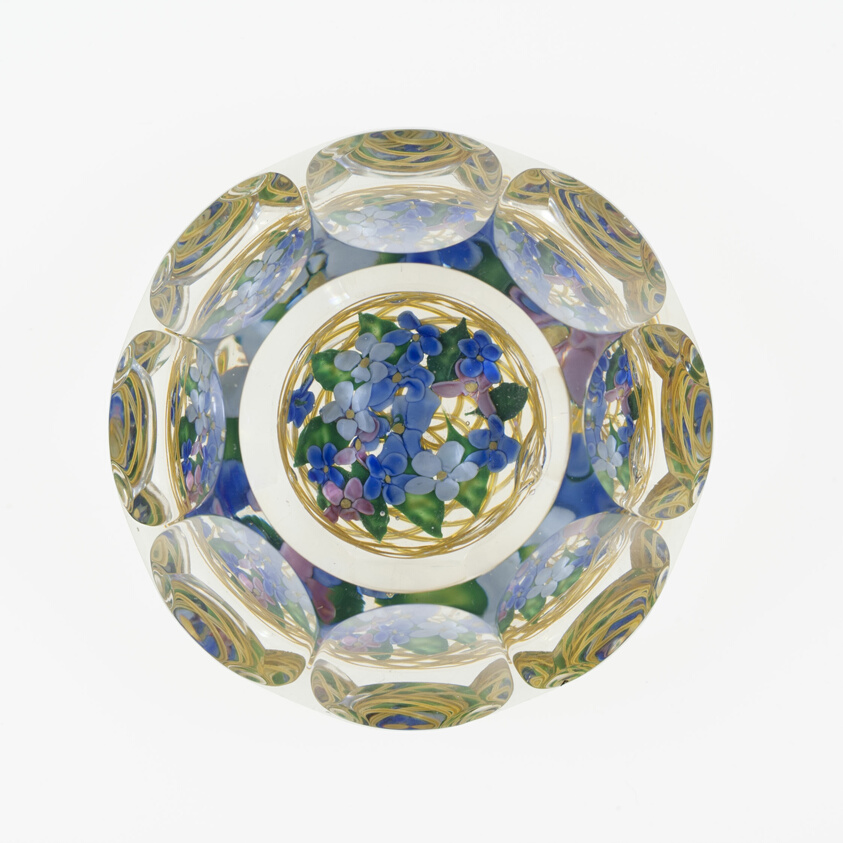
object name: Glass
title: Paperweight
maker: Clichy Glassworks (Cristalleries de Clichy); Clichy, France, 1837-1885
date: 19th century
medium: Glass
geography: Clichy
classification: paperweight; lampwork; european decorative arts; glass